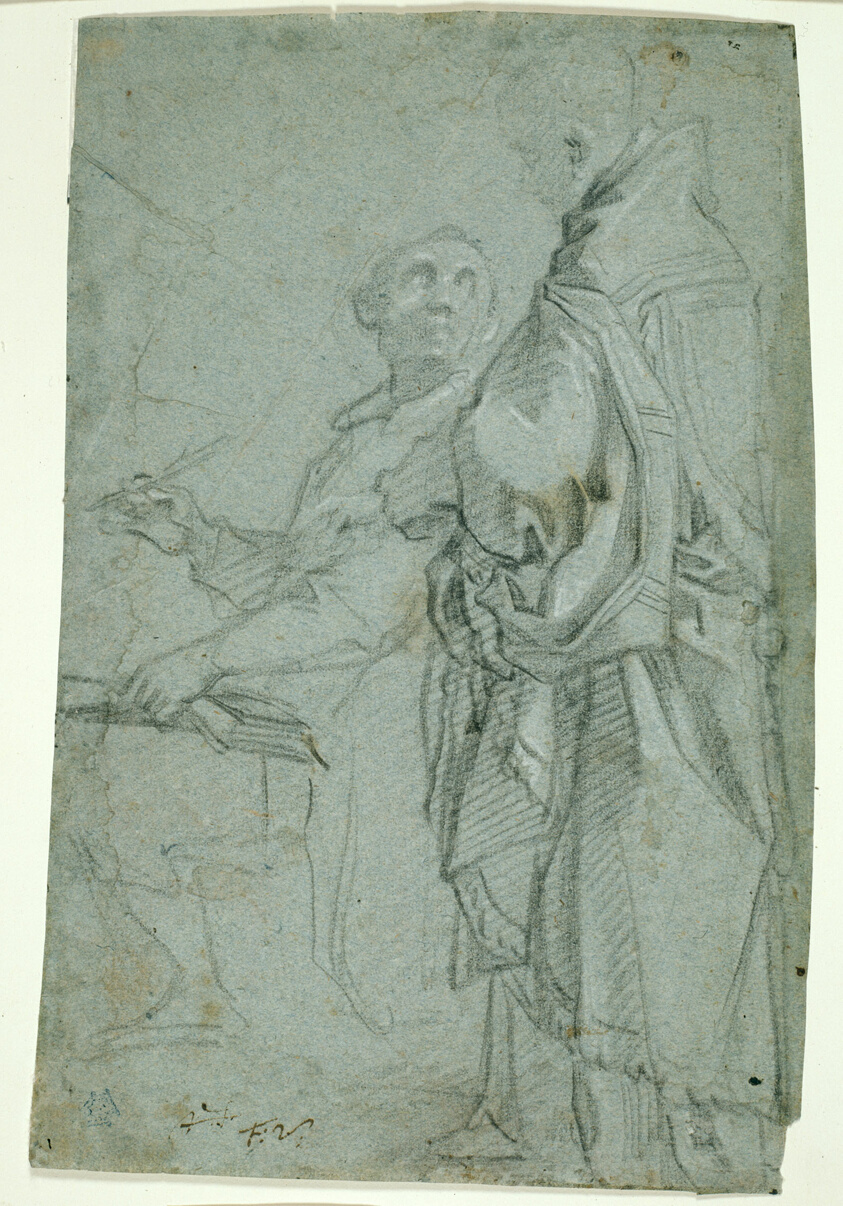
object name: Drawing and Watercolor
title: Two Ecclesiastics: Study for the Disputation on the Holy Sacrament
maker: Francesco Vanni (Italian, 1563-1610)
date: 1606/10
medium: Black chalk, heightened with white chalk, on blue laid paper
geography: Italy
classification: chalk; drawings (visual works); prints and drawing